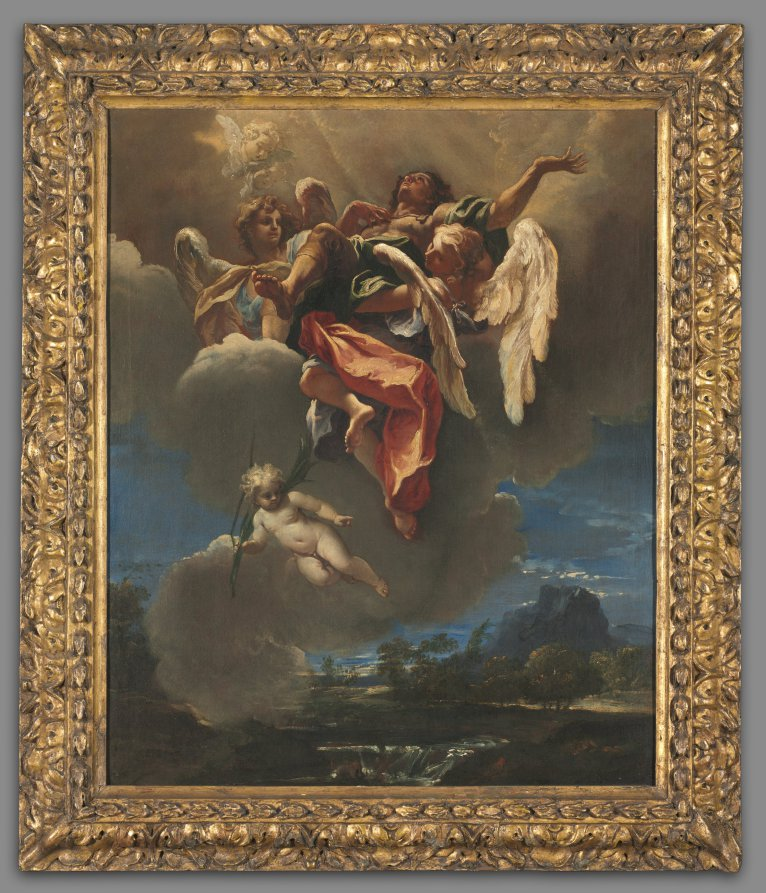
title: Study for "An Apotheosis of a Saint" (for San Bernardino dei Morti, Milan)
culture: Italy, 17th century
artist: Sebastiano Ricci (Italian, 1659–1734)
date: c. 1695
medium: oil on canvas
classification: Painting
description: This sketch represents an apotheosis, or a rise to heaven, of a saint. However, the precise identity of the figure remains unknown, since documents describing the commission have not yet been discovered, and the military costume does not sufficiently distinguish him.